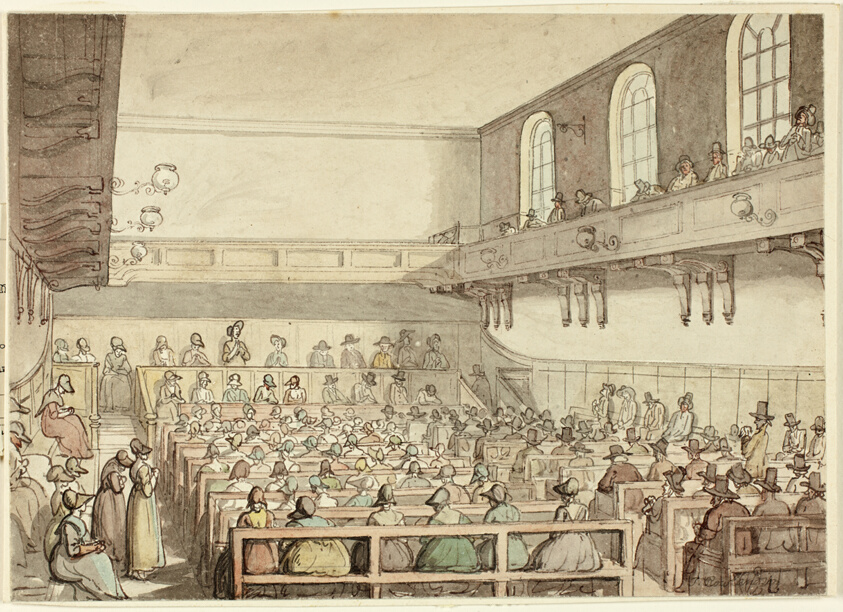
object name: Drawing and Watercolor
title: Quakers' Meeting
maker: Thomas Rowlandson (English, 1756-1827)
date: 1808/10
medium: Pen and brown ink and watercolor on paper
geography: England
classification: watercolor; drawings (visual works); prints and drawing